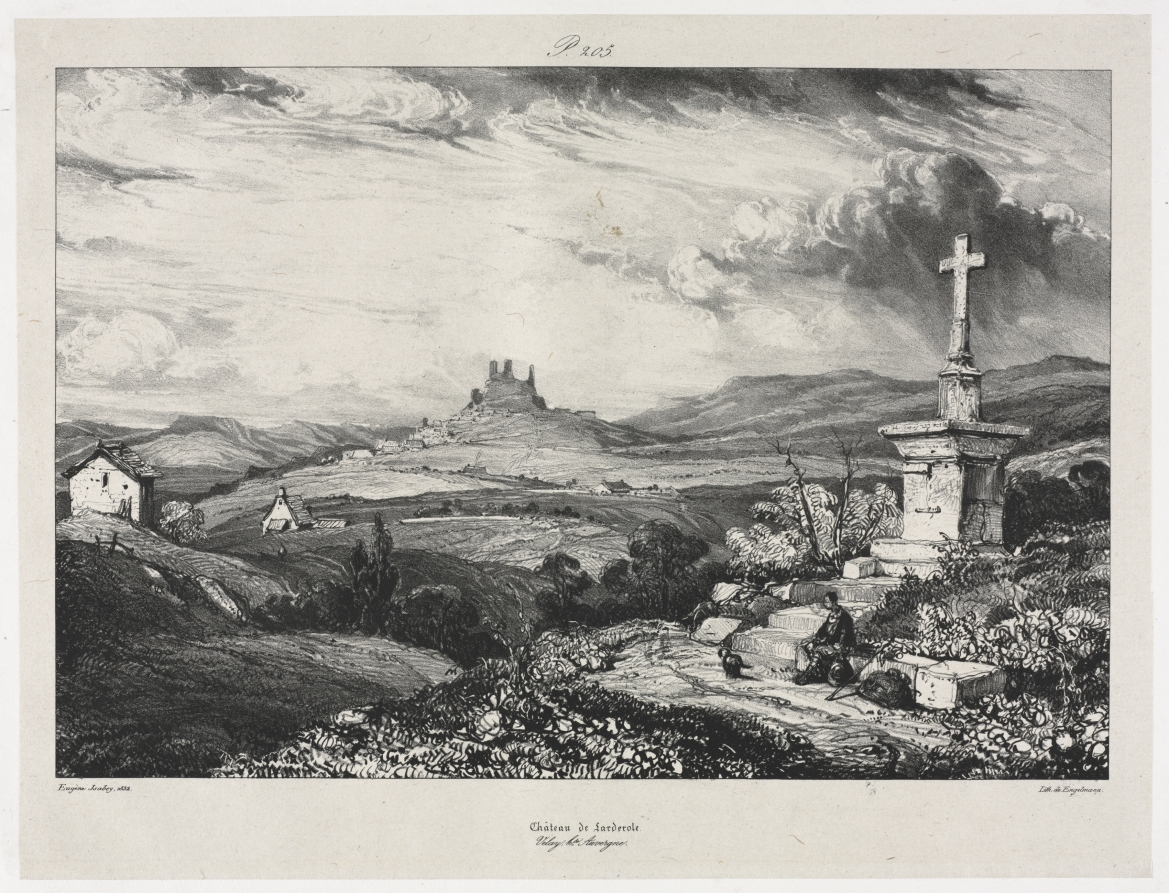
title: Château de Larderole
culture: France, 19th century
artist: Eugène Isabey (French, 1803–1886)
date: 1832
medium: lithograph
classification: Print